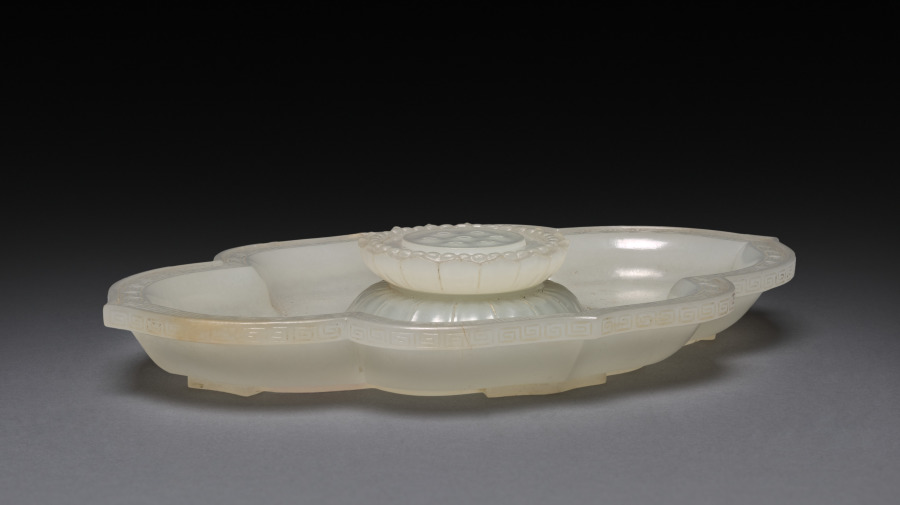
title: Lotus-shaped Dish and Cup (dish)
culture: China, Qing dynasty (1644–1911), Qianlong reign (1736–95)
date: 1736–95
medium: jade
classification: Jade